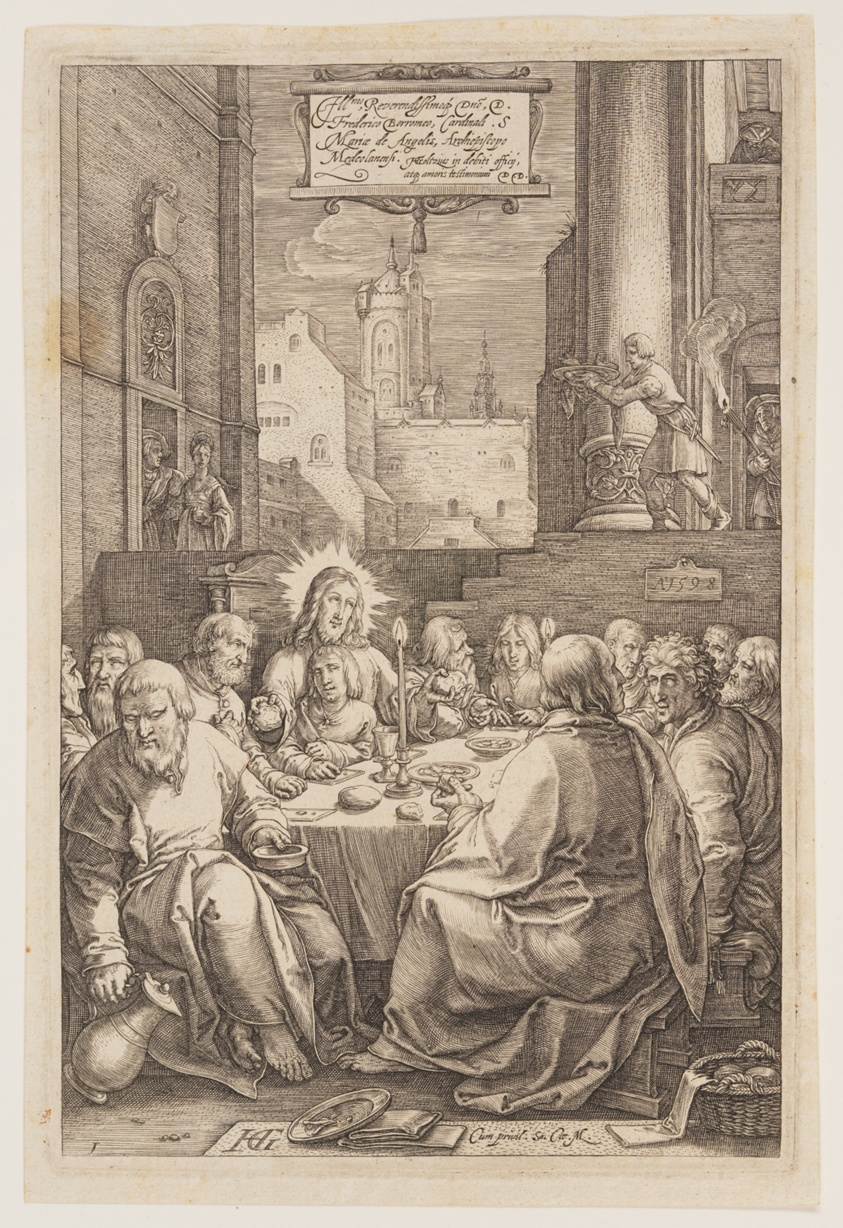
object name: Print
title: The Last Supper, from The Passion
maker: Hendrick Goltzius (Dutch, 1558–1617)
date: 1598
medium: Engraving on ivory laid paper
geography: Netherlands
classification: engraving; paper; print; prints and drawing